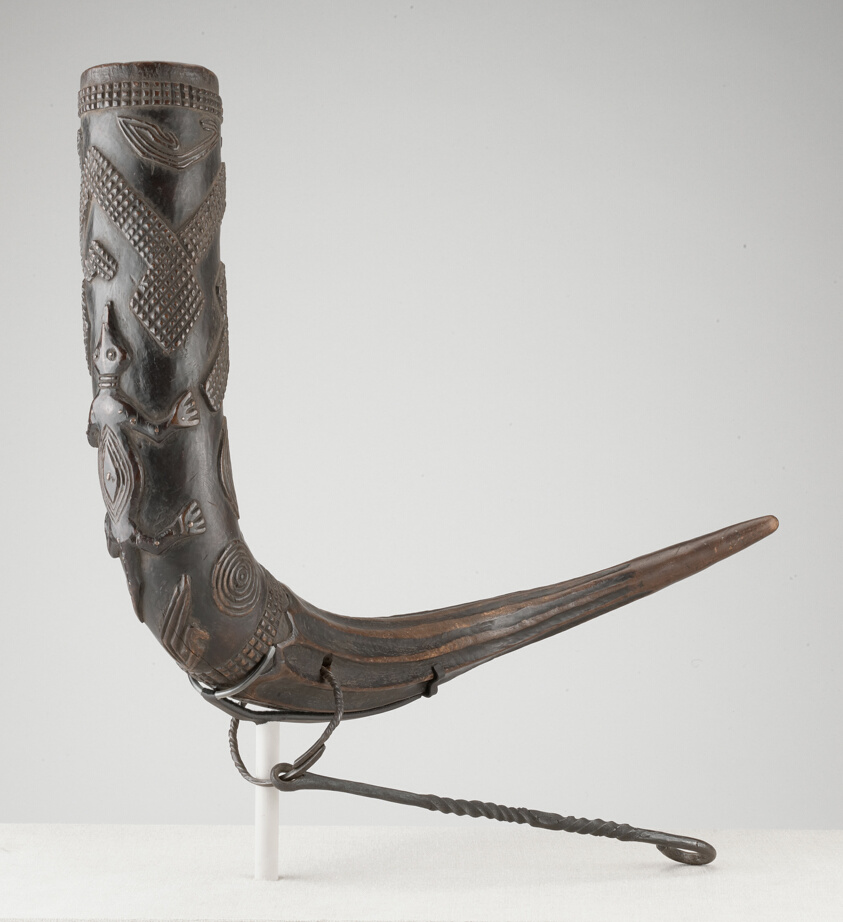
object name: Vessel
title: Horn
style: kuba (democratic republic of congo style, Arts of Africa, Central Africa, african Art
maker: Kuba; Kasai region, Democratic Republic of the Congo; Central Africa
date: Late 19th-early 20th century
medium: Wood, copper alloy, and iron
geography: Democratic Republic of the Congo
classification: drinking vessel; arts of Africa; vessel; african art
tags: drinking, animals, Buffalo, abstract figures, geometric, status